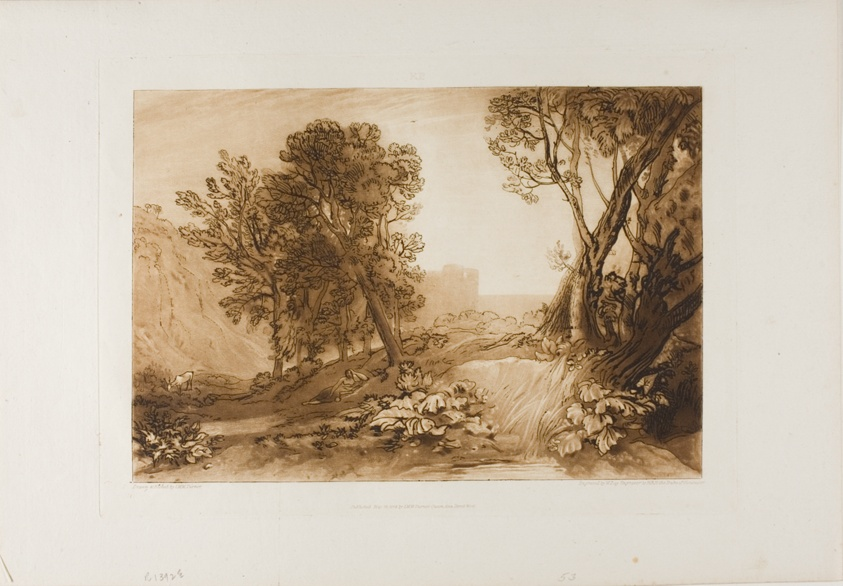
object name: Print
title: Solitute, plate 53 from Liber Studiorum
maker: Joseph Mallord William Turner (English, 1775-1851); Engraved by William Say (English, 1768-1834)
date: published May 12, 1814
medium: Etching and engraving on ivory laid paper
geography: England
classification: etching; print; prints and drawing